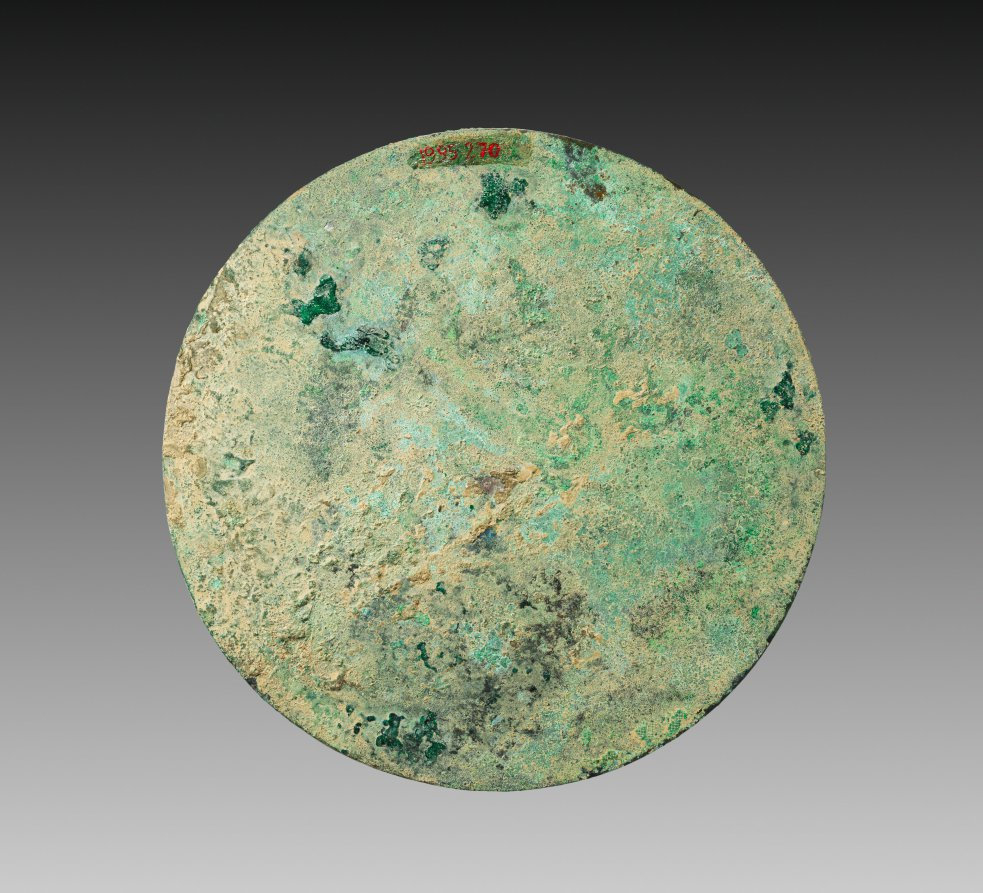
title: Mirror with Serpentine Interlaces and Angular Meanders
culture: China, Warring States period (475–221 BCE)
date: c. 325–275 BCE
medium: bronze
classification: Metalwork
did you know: This museum has the largest collection of Chinese mirrors outside of China.